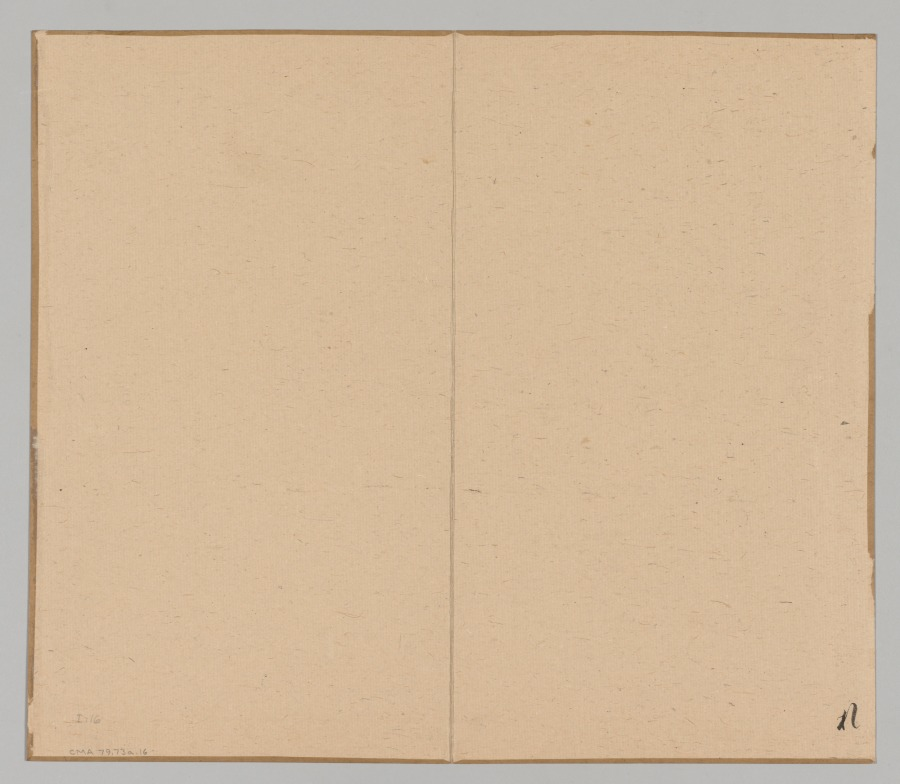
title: Reverberations of Taiga, Volume 1 (leaf 16)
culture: Japan, Edo period (1615–1868)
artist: Aoki Shukuya (Japanese, d. 1802)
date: mid- to late 1700s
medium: double-leaf from a pair of albums; ink and light color on paper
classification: Portfolio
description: Traditionally, young painters in Japan began their studies with an established master-painter. The master's compositions invariably became models that the apprentice copied to learn various ink and brush techniques. Shukuya was a pupil of the famous Kyoto artist Ikeno Taiga, whose style is reflected in these sketches of rocks, trees, and mountains.